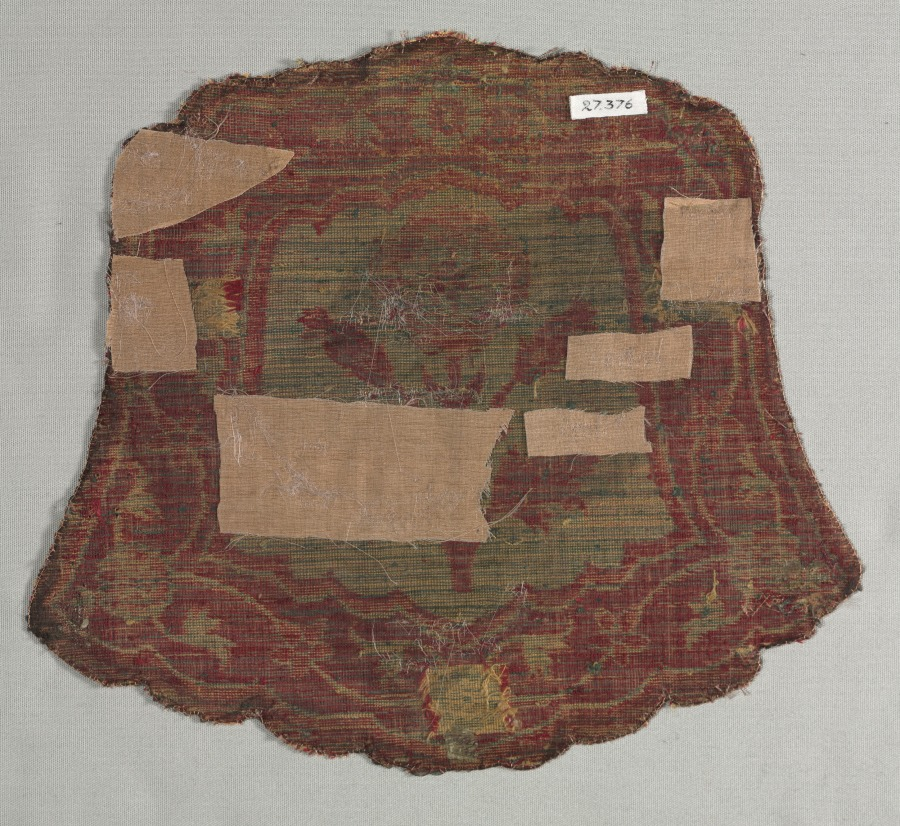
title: Shaped horse trapping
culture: India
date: 1600s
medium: velvet, brocaded and pile warp substitution: silk and gilt-metal thread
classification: Velvet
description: The scrolling floral vines in the border and the combination of gold with imperial crimson resonate with the painted depiction of the textiles that accompany portraits of the emperor. The poppy plant in the center can be identified by the leaves with multiple lacy points and may reference the opium in which Emperor Jahangir indulged daily.